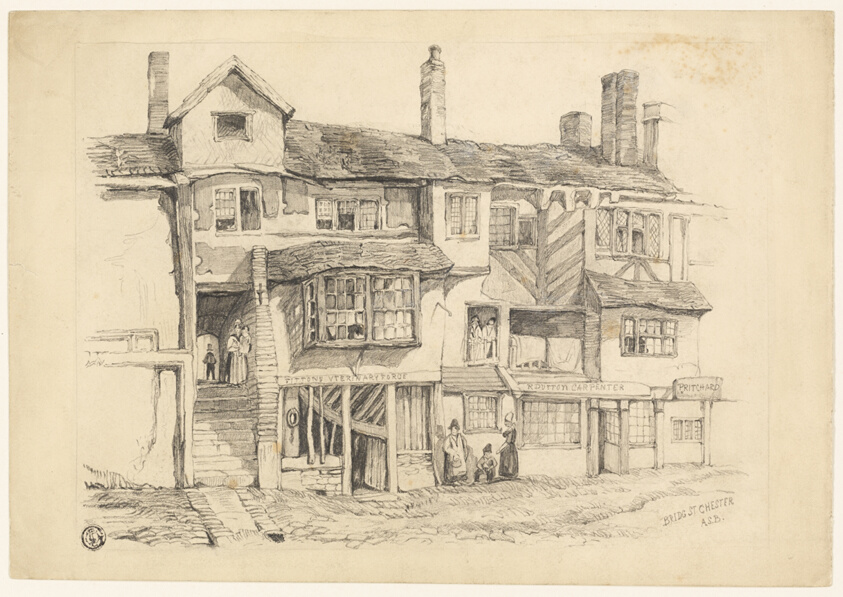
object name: Drawing and Watercolor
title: Bridge St. Chester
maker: Alexander Stuart Boyd (Scottish, 1854-1930)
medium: Graphite on tan wove paper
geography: Scotland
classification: graphite; drawings (visual works); prints and drawing